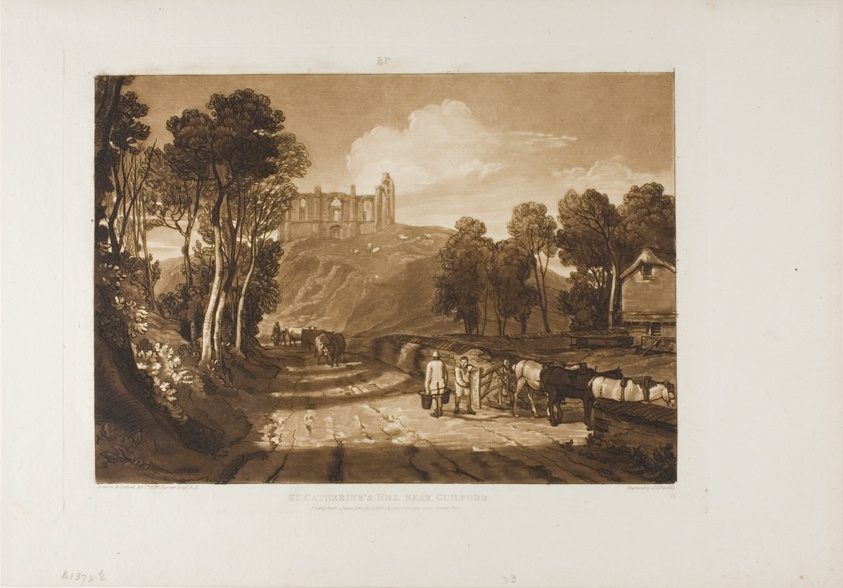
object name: Print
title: St. Catherine's Hill near Guilford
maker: Joseph Mallord William Turner (English, 1775-1851); Engraved by J. C. Easling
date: published June 1811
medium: Etching and engraving in brown on ivory laid paper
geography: England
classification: etching; print; prints and drawing